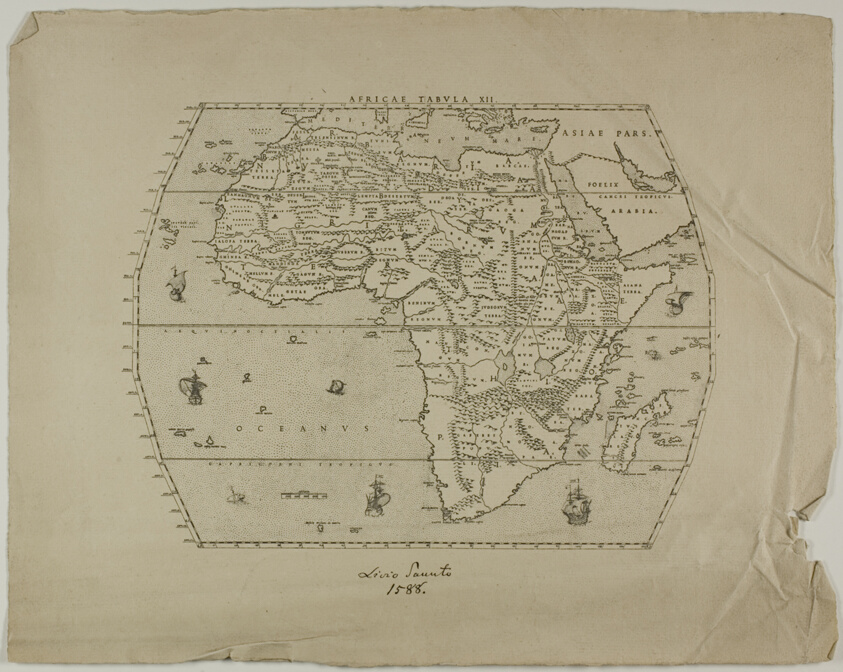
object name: Print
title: Africae Tabula XII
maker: Unknown Artist (English, 19th century); after Livio Sanuto (Italian, 1520-1576)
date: 1588, reprinted 1889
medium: Engraving in black on cream laid paper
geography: England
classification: reproduction; print; prints and drawing